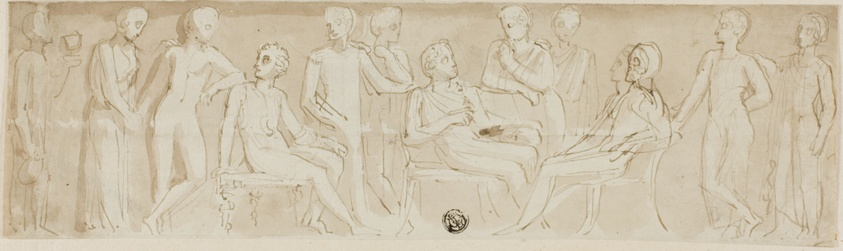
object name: Drawing and Watercolor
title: Frieze Design in Classical Manner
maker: Thomas Stothard (English, 1755-1834)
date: c. 1800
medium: Pen and brown ink with brush and brown wash, over graphite, on ivory laid paper, tipped onto tan wove paper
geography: England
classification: ink or chalk wash; drawings (visual works); prints and drawing